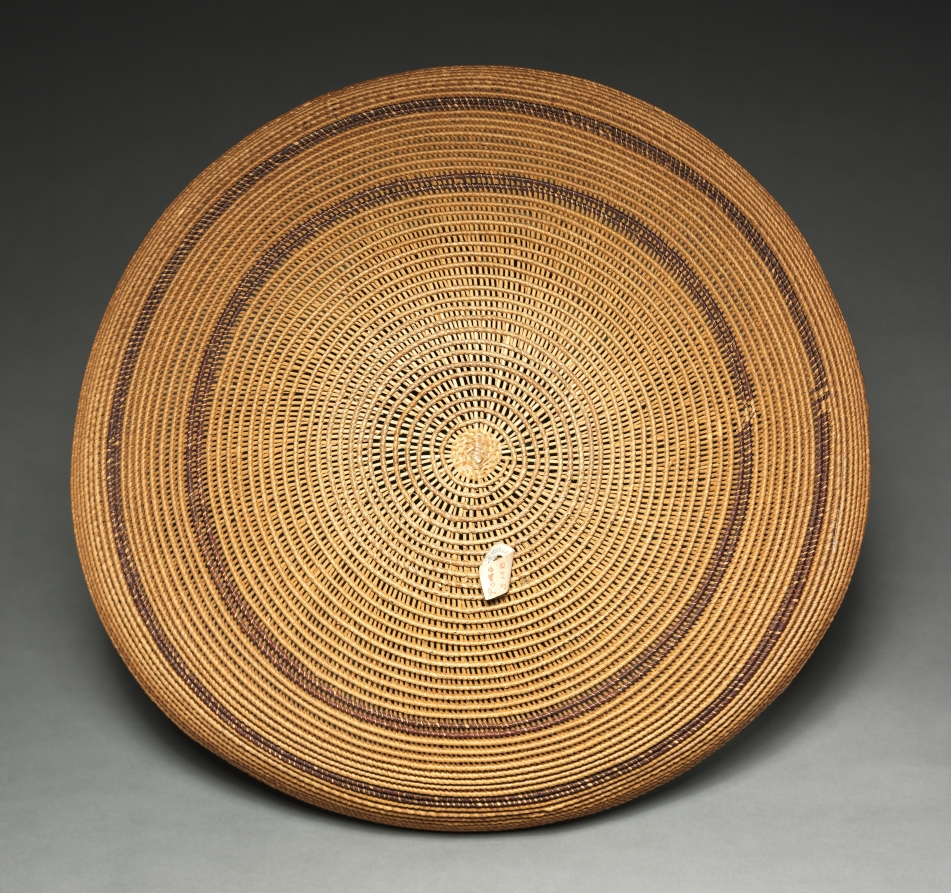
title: Tray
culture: California, Pomo, late 19th- early 20th century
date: 1895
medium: plain twine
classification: Basketry